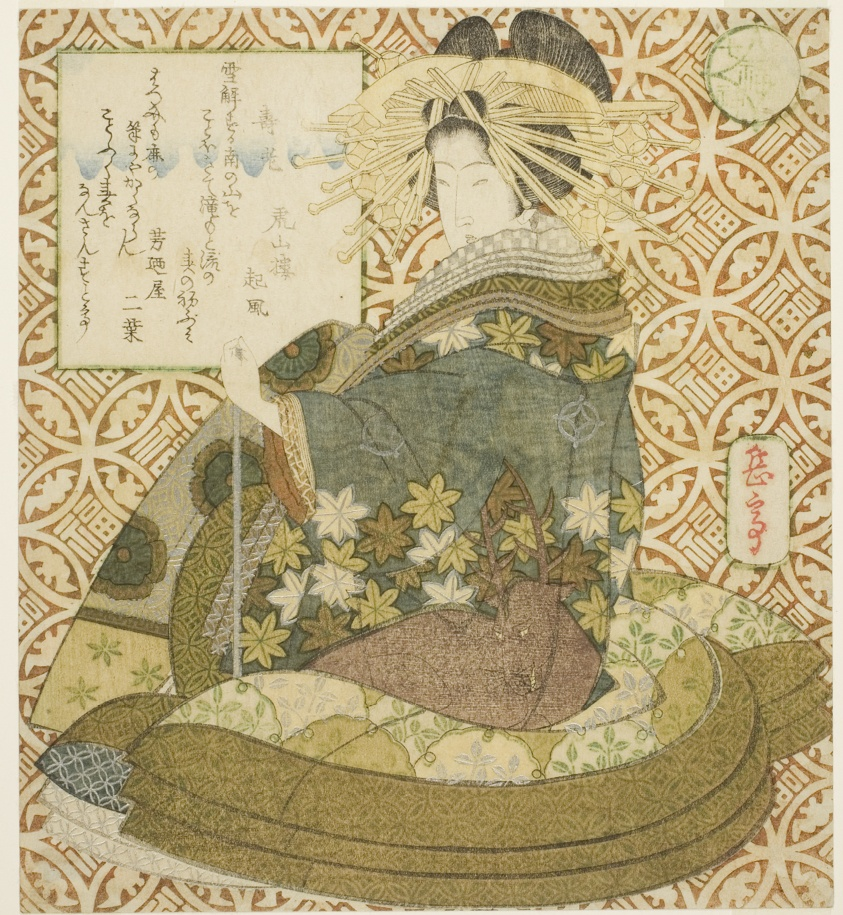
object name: Print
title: Jurojin, from the series "A Parody of the Seven Gods of Good Fortune (Mitate shichifukujin)"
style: Japanese (culture or style)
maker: Yashima Gakutei (Japanese, 1786 (?)-1868)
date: c. 1828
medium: Color woodblock print; shikishiban, surimono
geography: Japan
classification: woodblock print; print; asian art